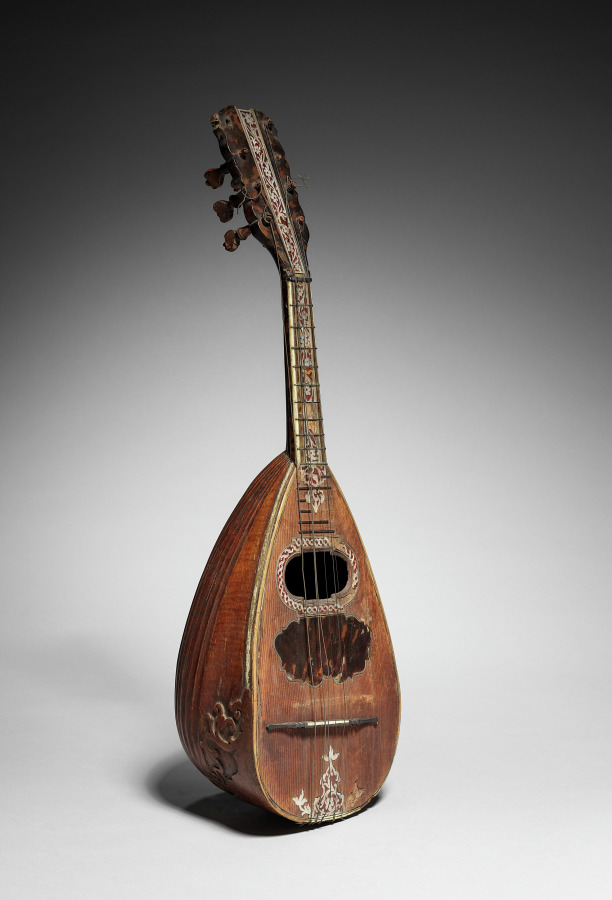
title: Mandolin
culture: Italy, Naples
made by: Giovanni Battista (Italian)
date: 1785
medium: varnished wood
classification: Musical Instrument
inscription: on ticket inside: "Gio: Battista Fabricatore fecit. An, 1785 in S. M. dell' Ajuto, Napoli."